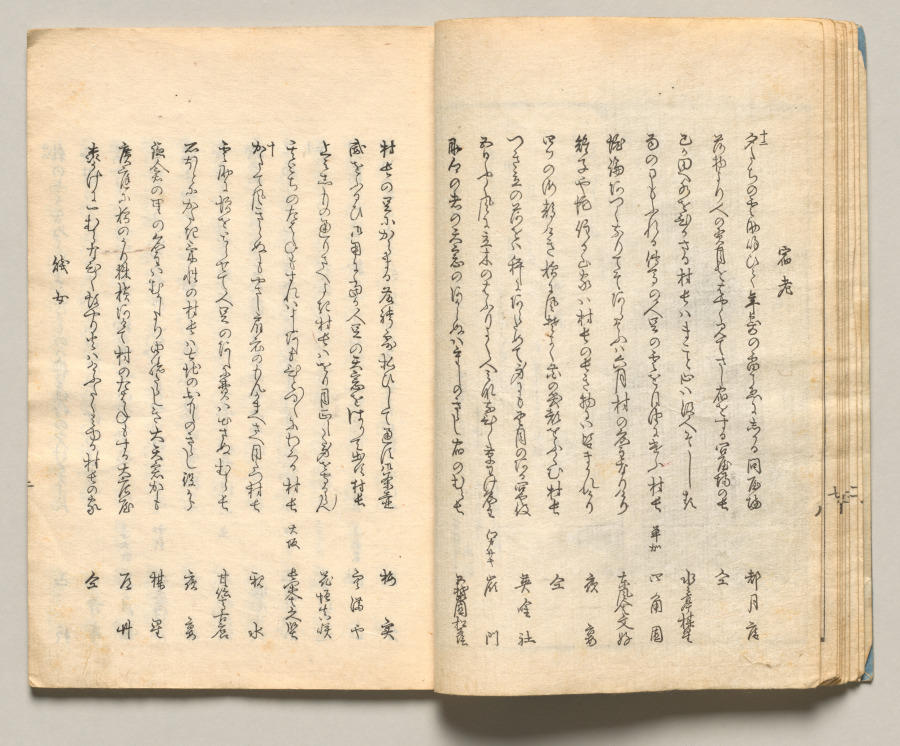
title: Spread Nine from Volume Three of People of Japan in Light Verse (Kyōka)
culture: Japan, Edo period (1615–1868)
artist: Utagawa Hiroshige (Japanese, 1797–1858)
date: 1857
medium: Woodblock-printed book; ink and color on paper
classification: Bound Volume